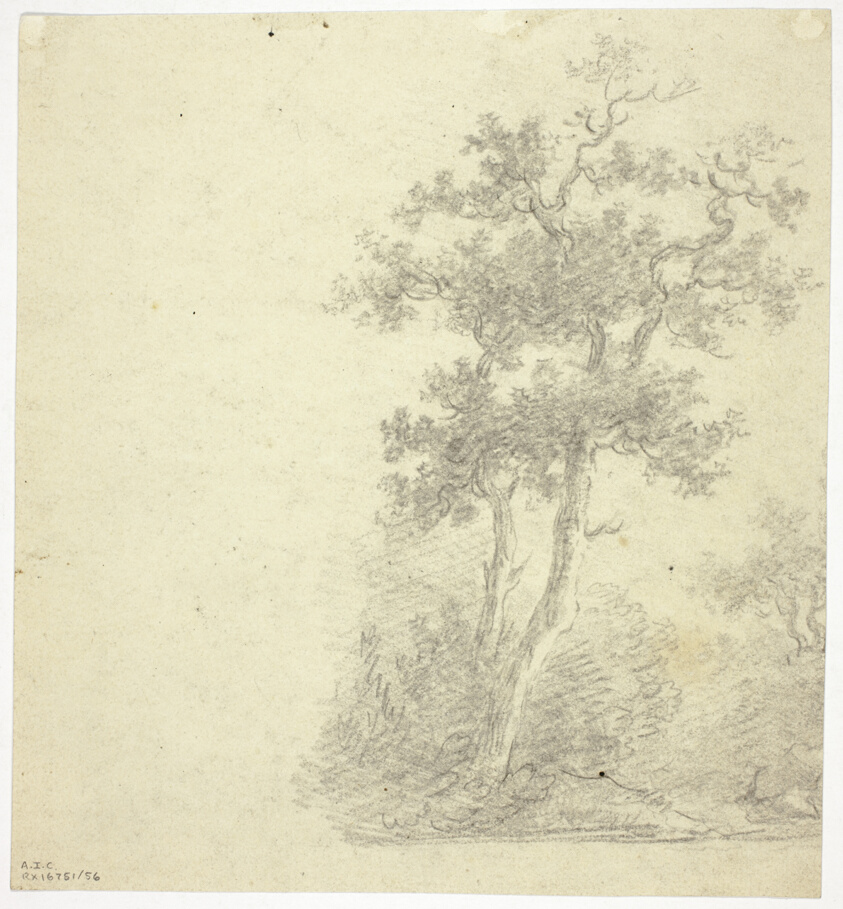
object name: Drawing and Watercolor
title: Mill (recto); Tree (verso)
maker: Unknown Artist (British, 18th century); or possibly Thomas Gainsborough (English, 1727-1788)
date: n.d. (recto); 1780/1789 (verso)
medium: Black chalk (recto and verso) on off white wove paper, tipped onto cream wove paper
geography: England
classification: charcoal; drawings (visual works); prints and drawing